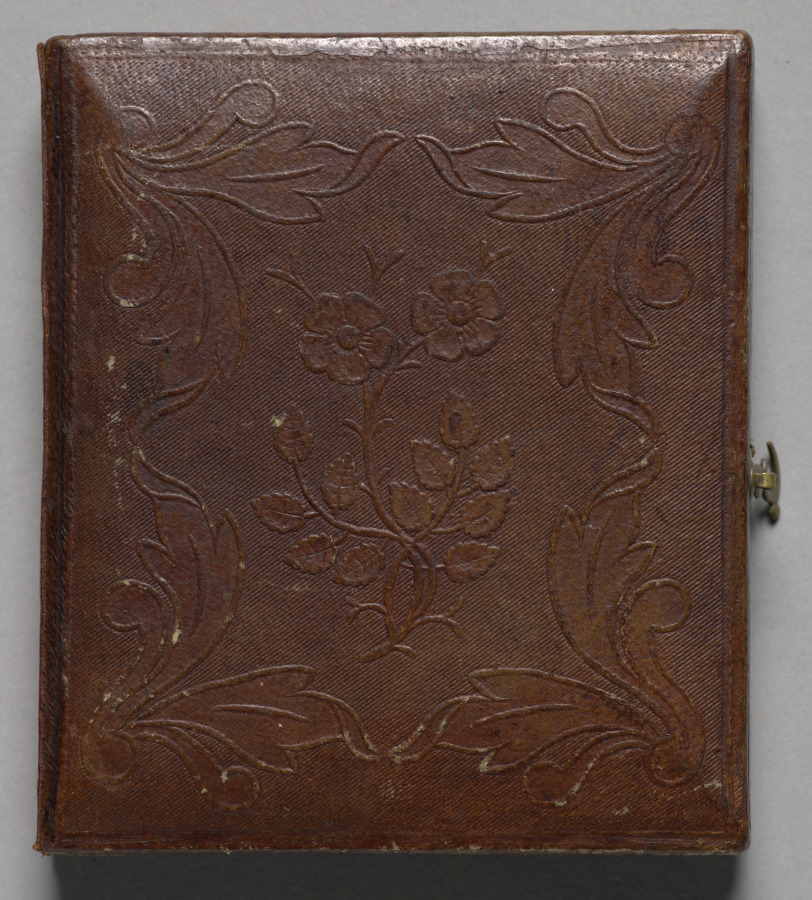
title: Architect with his drawings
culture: America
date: c. 1850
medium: daguerreotype, sixth plate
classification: Photograph